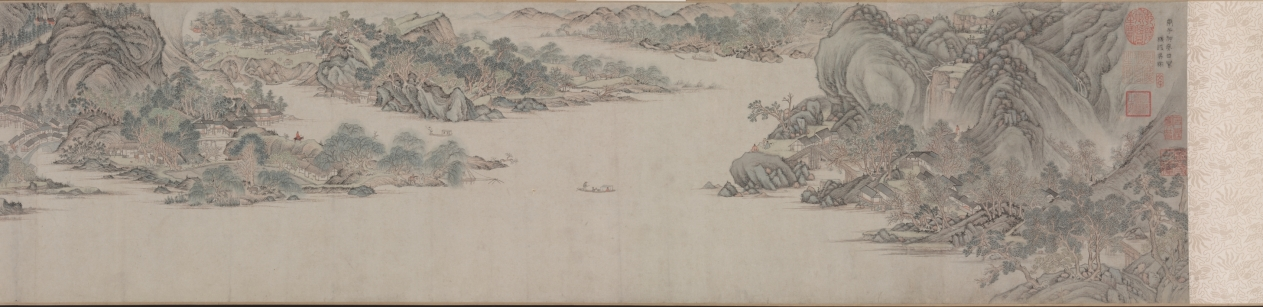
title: Greeting the Spring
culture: China, Ming dynasty (1368–1644)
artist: Wu Bin (Chinese, active c. 1591–1626)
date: 1600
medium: handscroll; ink and light color on paper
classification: Painting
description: This masterfully composed landscape in light colors and delicate brushwork is an image of the water-rich Jiangnan region in southeast China, where Wu Bin was active as an artist. Embedded in rolling hills along lakesides and streams nestle cityscapes hosting numerous spring festivities. Lantern displays and street performances in the villages salute the New Year, and are interwoven with scenes of farming, fishing, and silk making. In one scene in the middle ground, an ox made of clay under a canopy is lead in a procession to an architectural compound, a ceremony known as whipping the spring ox in hope for a good harvest. This handscroll bears five collector seals by the Qianlong emperor indicating his appreciation for the painting.